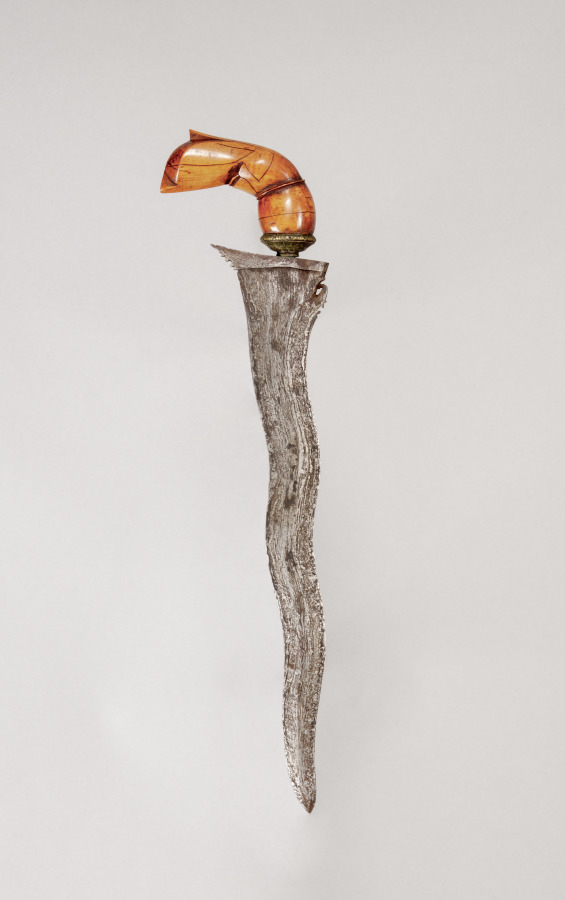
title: Sword (Kris)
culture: Java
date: 1800s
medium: iron with wooden handle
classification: Arms and Armor